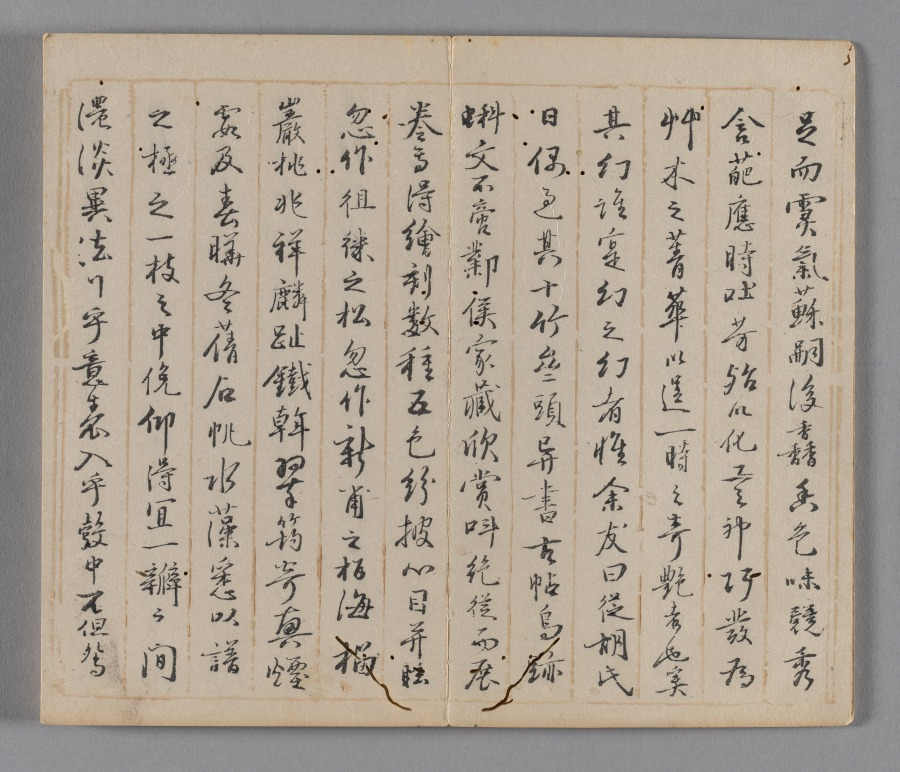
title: Ten Bamboo Studio Collection of Calligraphy and Painting: Round Fans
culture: China, Qing dynasty (1644-1911)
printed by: Hu Zhengyan (Chinese, c. 1584–1674)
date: 1633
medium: Woodblock-printed book; ink and colors on paper; first edition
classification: Print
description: Color printing reached a level of perfection in the early 1600s, as seen in this Ten Bamboo Studio Collection of Calligraphy and Painting and the Mustard Seed Garden Manual of Painting (printed 1679 and 1701). The painterly quality, precision in registering (aligning) the woodblocks, and harmonious colors made them the most successful color print editions in Chinese history. Both editions were printed and compiled in Nanjing, spread nationwide, and had a great impact on the arts in Japan and Korea.